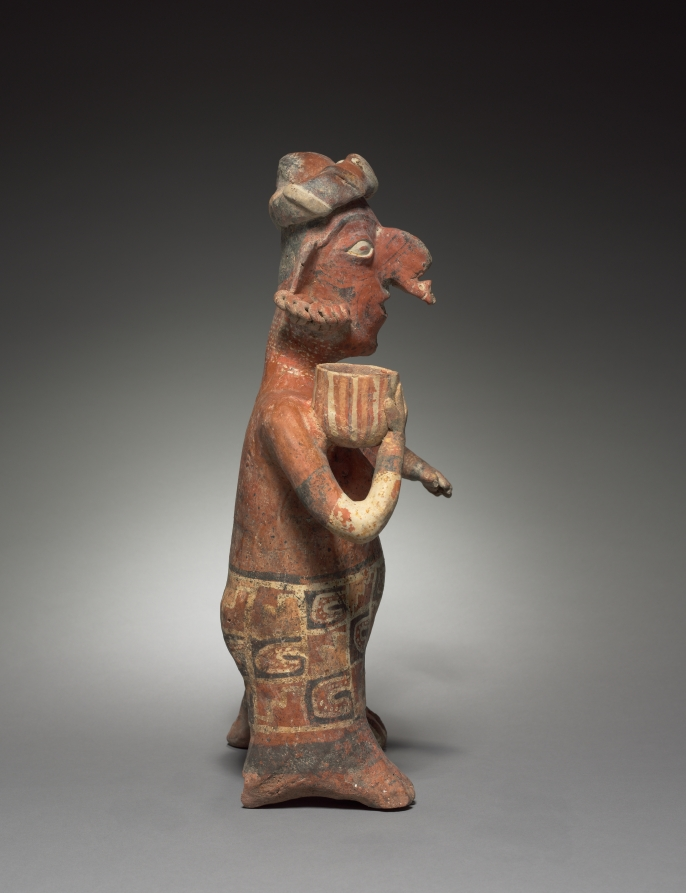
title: Standing Female Figure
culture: Mexico, Nayarit, Ixtlan del Rio style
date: c. 100 BCE–300 CE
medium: earthenware with colored slips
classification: Sculpture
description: Nagarit ceramic sculputres, like those of Colima, were manufactured for burial with the dead. The popular male-female couples may be portraits of the individuals with whom they were buried. This female figure, dressed in a colorful skirt and hat, has painted or tattooed patterns on her torso and face. Jewelry adorns her face, ears, and nose. The vessel on her shoulder symbolizes her domestic duties.